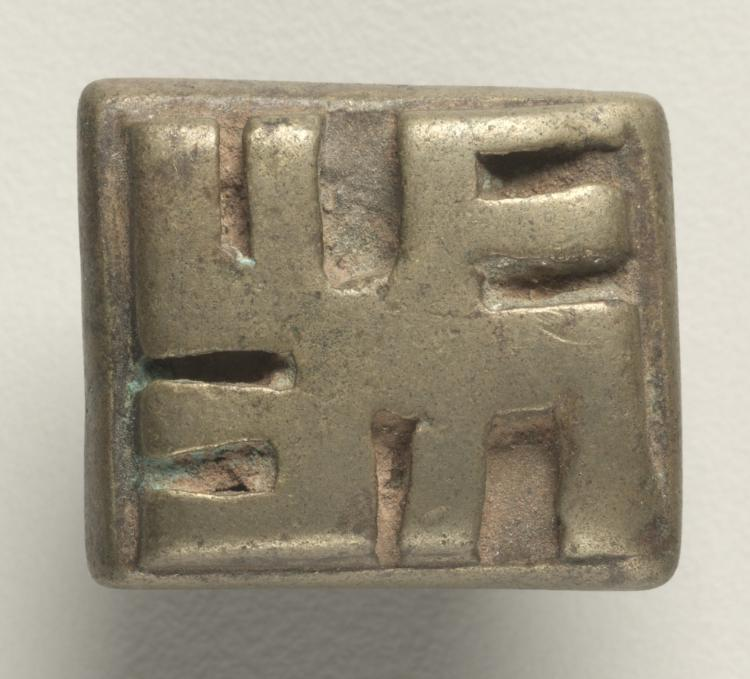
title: Gold Weight (abrammuo): Geometric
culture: Africa, West Africa, Ghana, Asante goldsmith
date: 1800s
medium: Copper alloy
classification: Implements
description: The wealth and power of the Asante kingdom was derived primarily from its massive gold resources. Since at least 1600, small weights in brass and bronze were used to weight gold dust and nuggets. The royal court had the most elaborate store of weights, while commoners often had about a dozen. Their imagery falls into two broad cateogries: geometric and representational. The latter often refers to proverbs, which used judiciously, marked a wise person.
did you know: Geometric weights like this are the earliest form of these small, functional objects.